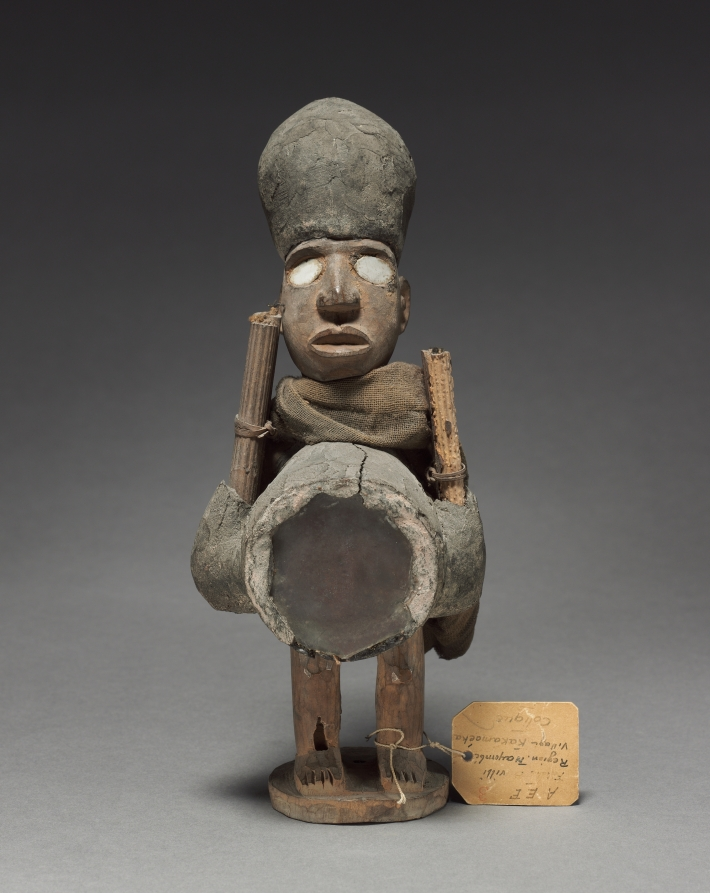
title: Power figure (nkisi)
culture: Africa, Central Africa, Republic of the Congo, Kongo-style maker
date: late 1800s–early 1900s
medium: Wood, organic materials (including resin), cloth, metalized glass, possibly porcelain, and plant fiber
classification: Sculpture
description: This figure is one of the two tallest of the seven anthropomorphic minkisi figurines previously in the Delenne collection. Identified as an nduda, two upward “guns” are attached on its side loaded with gunpowder used to shoot witches. Its label bears the word colique, a term referring to heavy pains caused by intestinal obstruction.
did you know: The object’s two small guns are pointing upward, but bears the label “colique,” a term referring to heavy pains caused by intestinal obstruction.